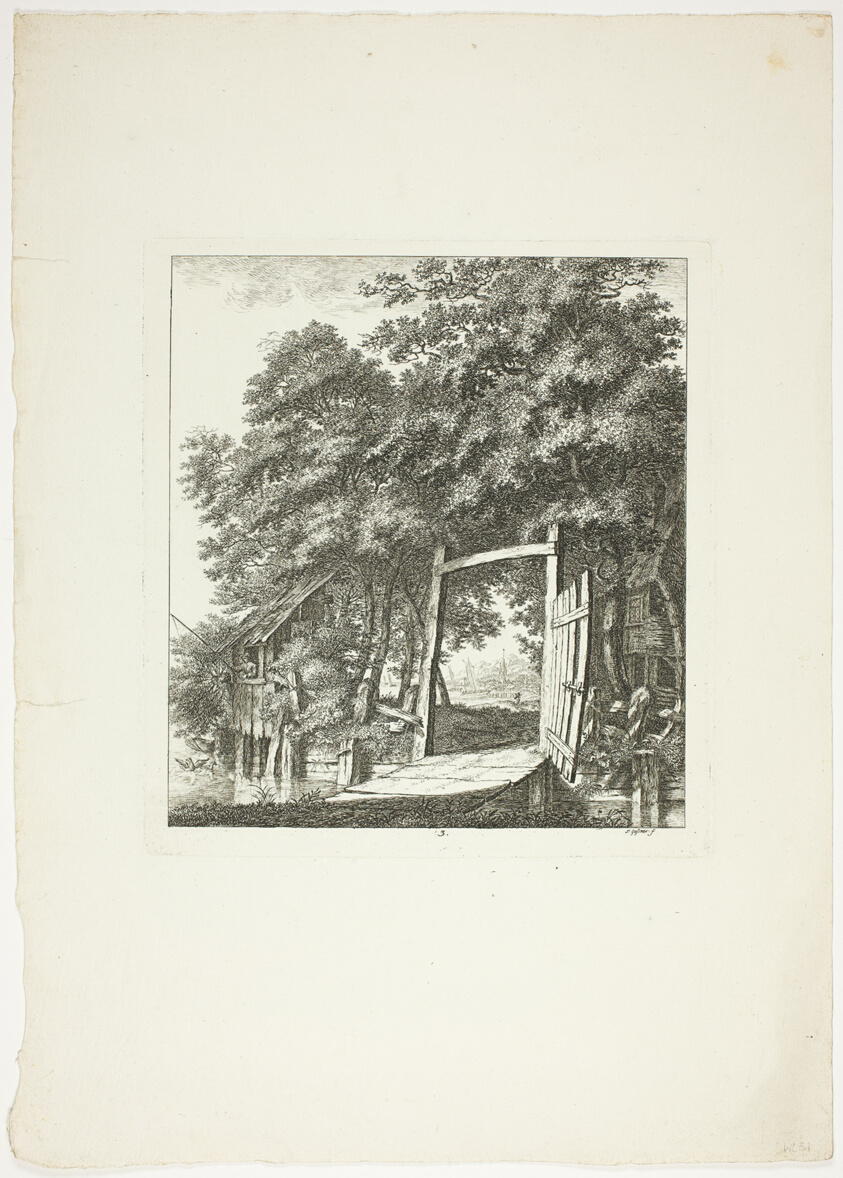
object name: Print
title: Fishing from a Window, plate three from Paysages Dédiés à M. Warelet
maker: Salomon Gessner (Swiss, 1730-1788)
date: 1764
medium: Etching on cream laid paper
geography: Switzerland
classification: etching; print; prints and drawing